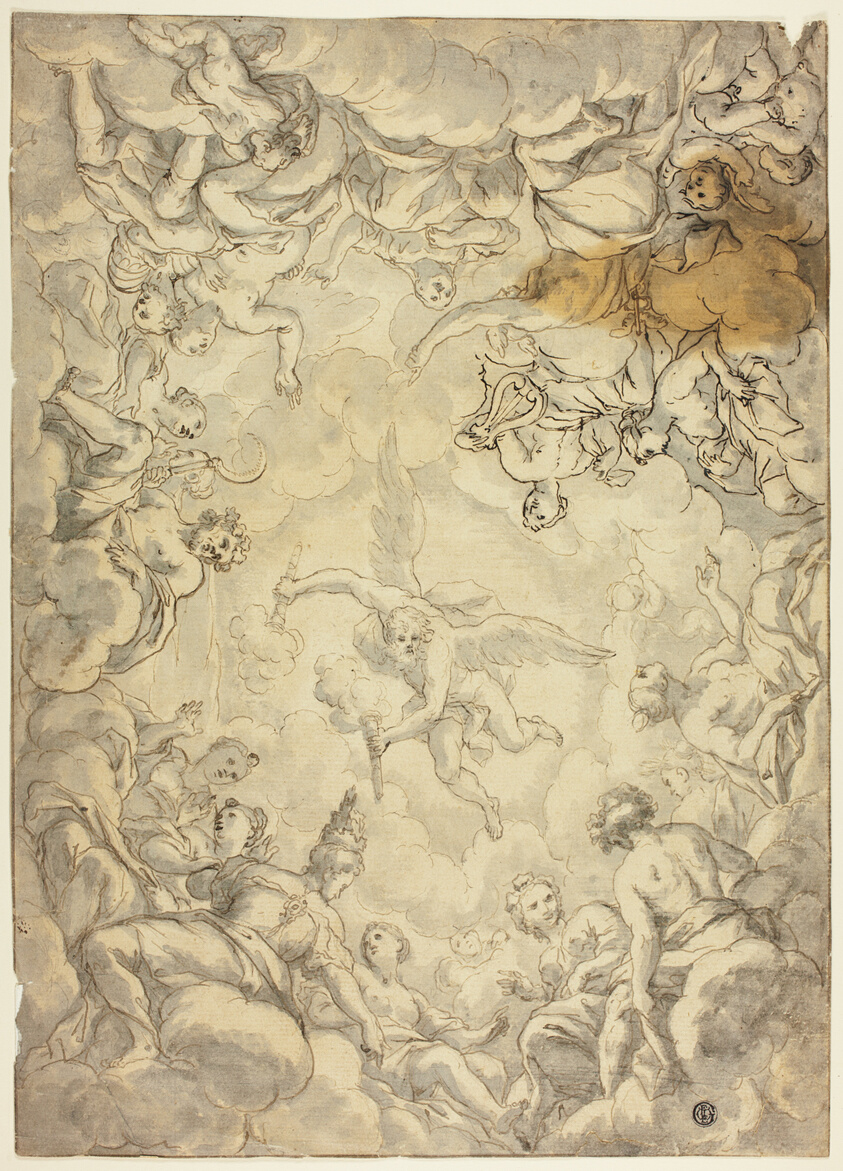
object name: Drawing and Watercolor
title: Prometheus Taking Fire From Olympus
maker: Possibly Ludovico Cardi, called Il Cigoli (Italian, 1559-1613); or possibly Marco Antonio Franceschini (Italian, 1648-1729); or possibly Circle of Lorenzo de' Ferrari (Italian, 1680-1744); or possibly Circle of Paolo de Matteis (Italian, 1662-c. 1728)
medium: Pen and brown ink with brush and gray wash, over traces of black chalk, on tan laid paper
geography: Italy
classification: drawings (visual works); prints and drawing